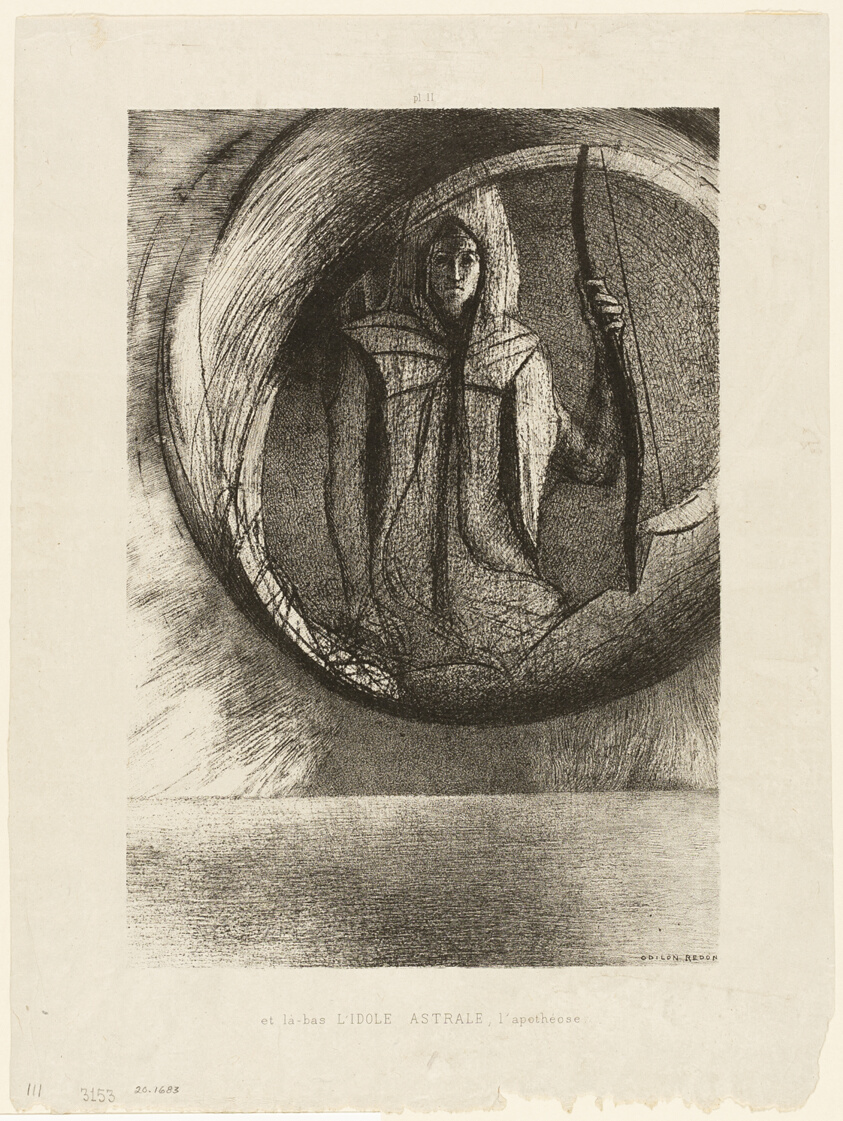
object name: Print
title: And Beyond, the Astral Idol, the Apotheosis, plate 2 of 6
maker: Odilon Redon (French, 1840-1916)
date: 1891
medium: Lithograph in black on light gray chine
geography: France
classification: lithograph; print; prints and drawing; paper